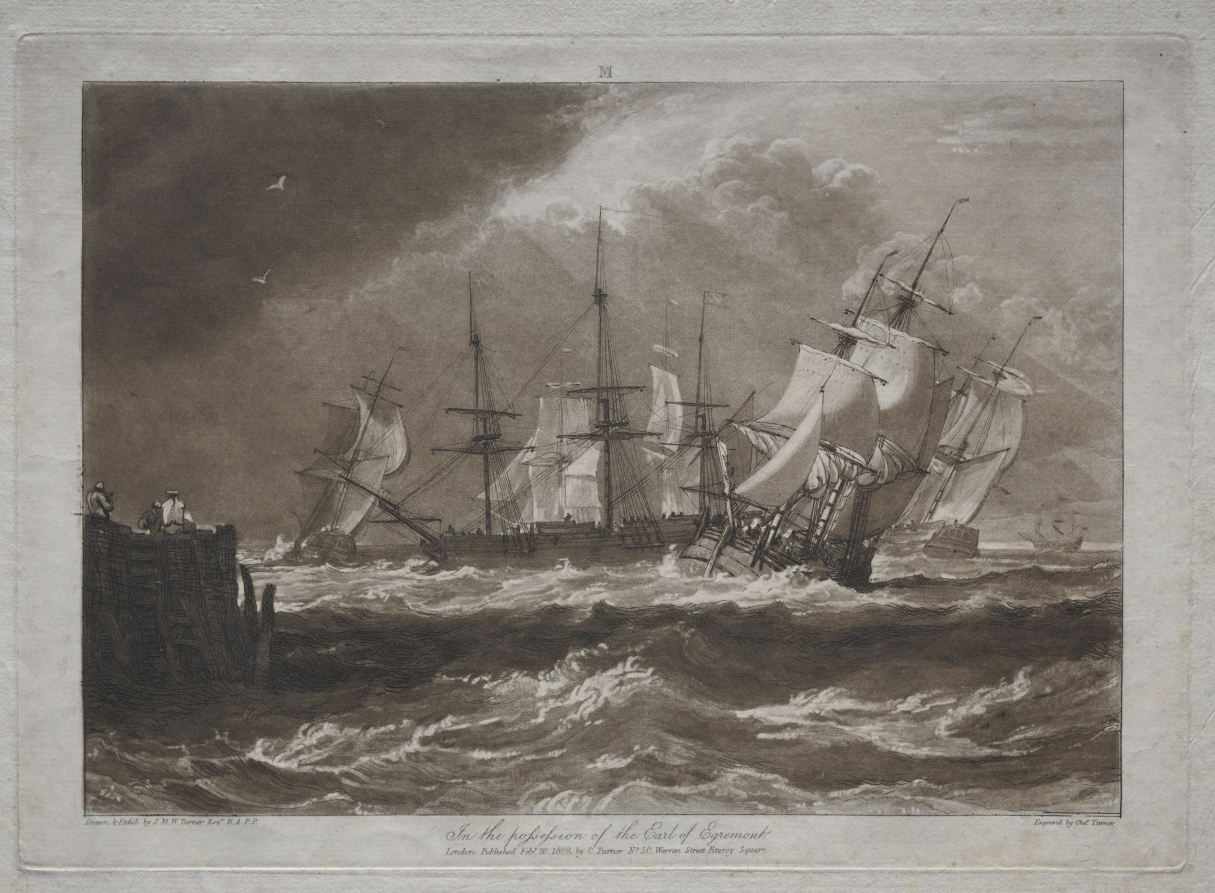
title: Liber Studiorum: Ships in a Breeze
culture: England, 19th century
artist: Joseph Mallord William Turner (British, 1775–1851)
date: 1808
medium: etching and mezzotint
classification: Print